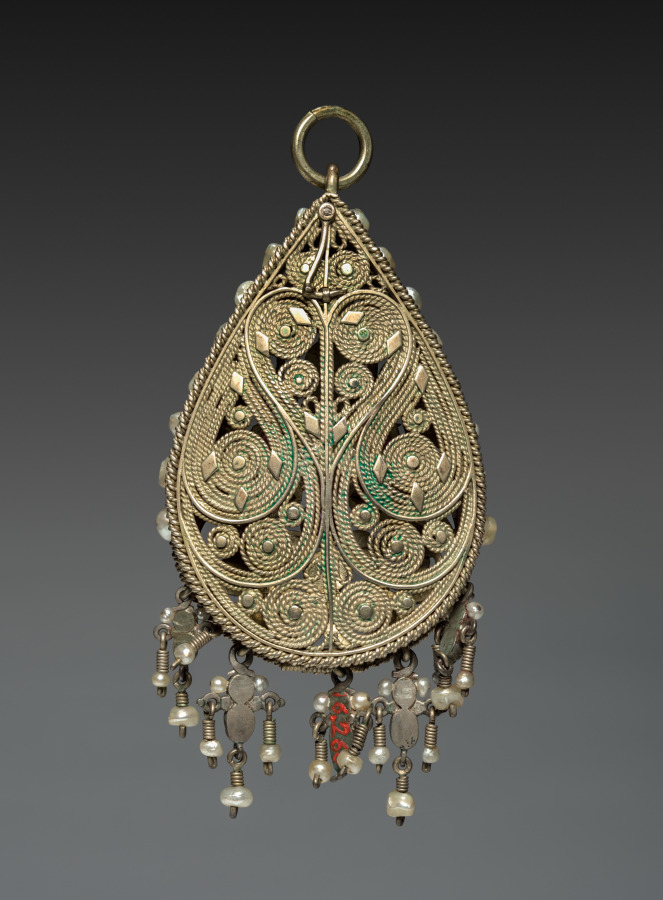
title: Pendant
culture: Balkans, 19th century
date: 1800s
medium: silver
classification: Jewelry